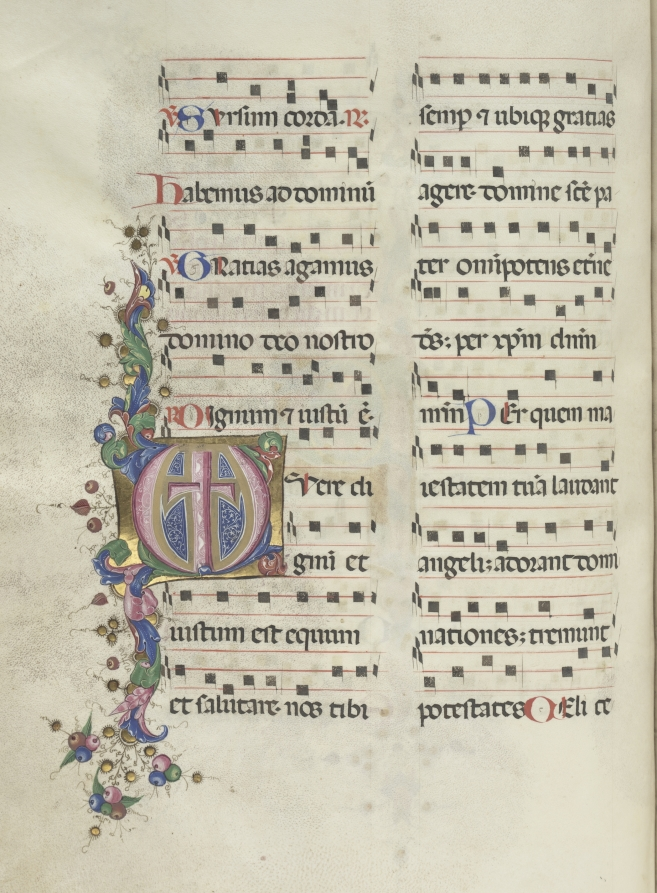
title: Missale: Fol. 183v: Cross, Foliage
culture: Italy, Perugia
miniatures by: Bartolommeo Caporali (Italian, c. 1420–1503)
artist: assisted by Giapeco Caporali (Italian, d. 1478)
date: 1469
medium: ink, tempera and burnished gold on vellum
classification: Bound Volume